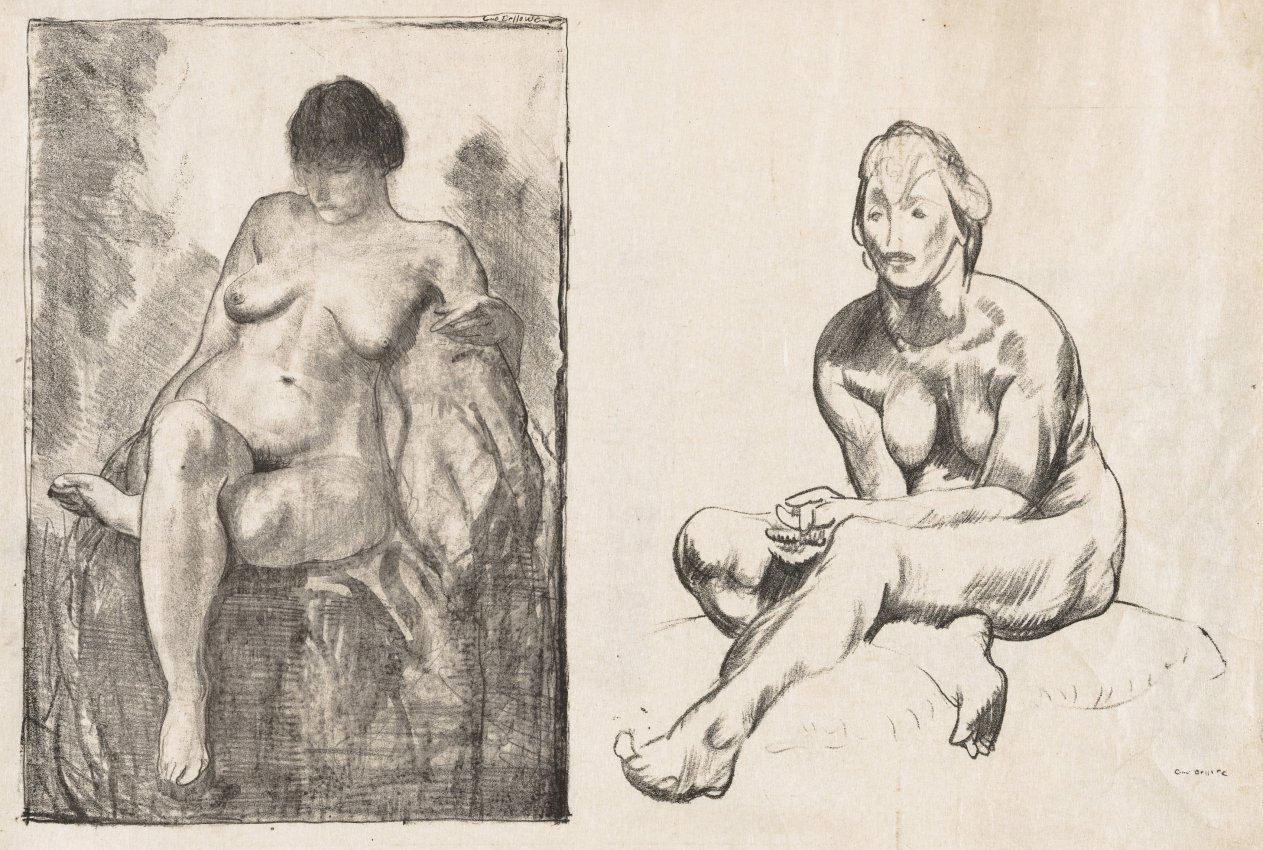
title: Life Study, Nude Woman Seated With Folded Hands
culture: America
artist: George Bellows (American, 1882–1925)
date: 1917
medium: lithograph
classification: Print